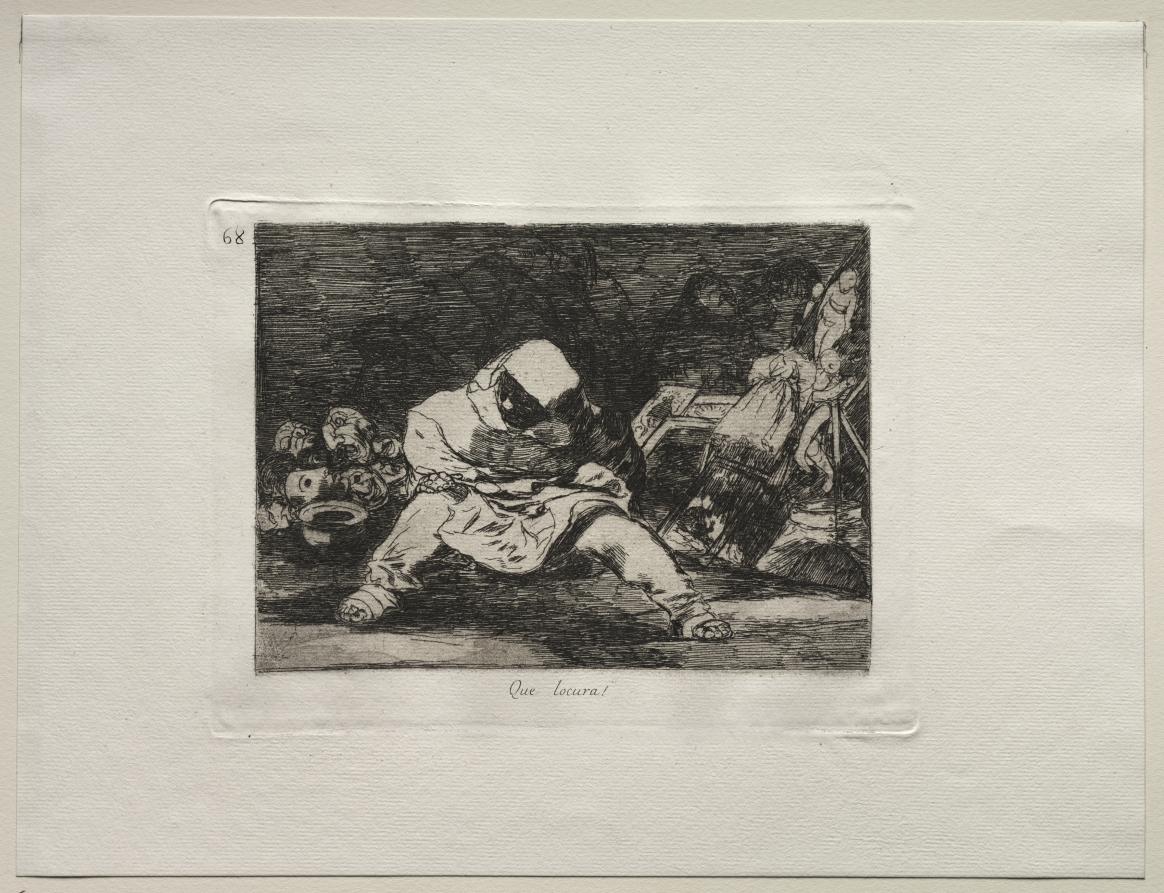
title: The Horrors of War: What Madness!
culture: Spain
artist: Francisco de Goya (Spanish, 1746–1828)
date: 1810–20, published 1863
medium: etching and aquatint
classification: Print